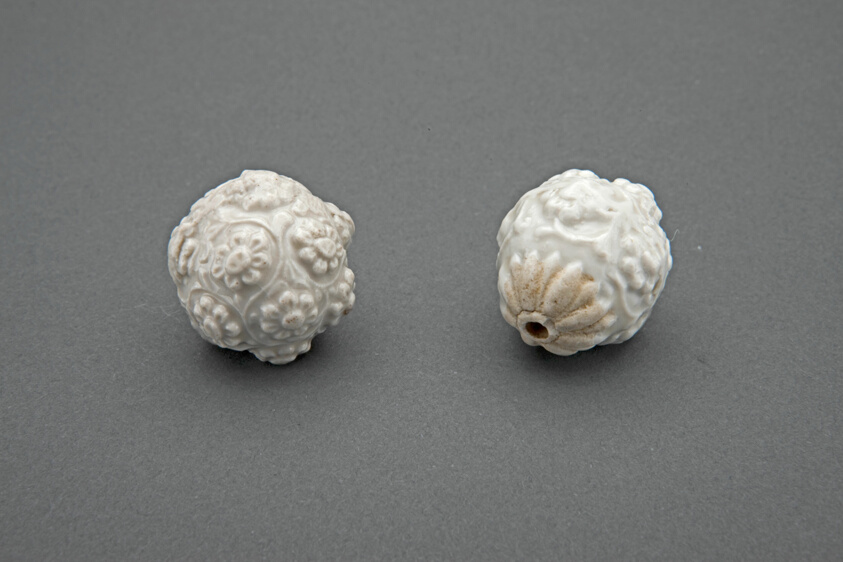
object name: Costume and Accessories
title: Pair of Hairpin Finials with Flower Heads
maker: China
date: Song dynasty (960–1279)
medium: Ding ware, porcelain with underglaze molded decoration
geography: China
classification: decorative arts